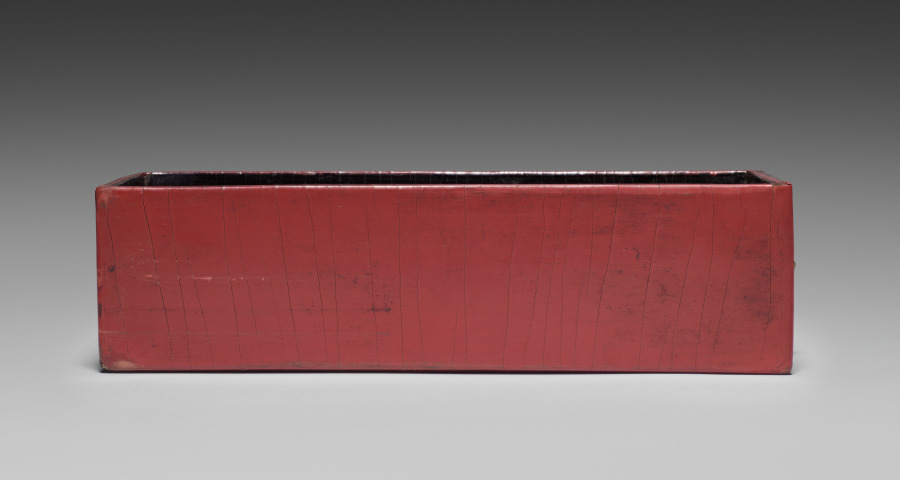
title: Drawer for a Tihong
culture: China, Ming dynasty (1368-1644), Wanli reign (1572-1620)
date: 1585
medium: carved cinnabar lacquer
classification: Lacquer